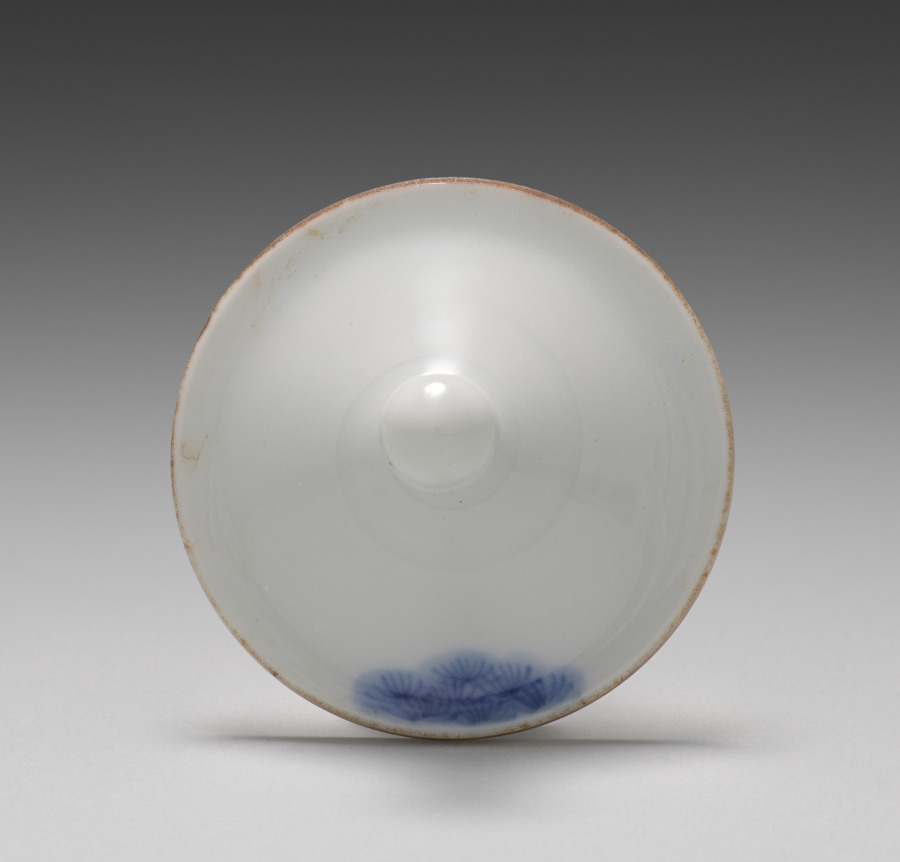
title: Lid for a Teapot with Pines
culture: Japan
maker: Seifū Yohei III (Japanese, 1851–1914)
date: 1893–1914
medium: Porcelain with underglaze blue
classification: Ceramic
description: Side-handled teapots known as kyūsu and hot water coolers, or yuzamashi, are essential components of sencha tea sets. The teapot is, of course, meant for steeping and serving the tea. Yuzamashi are used to cool boiled water to the ideal temperature for the type of tea to be brewed. This teapot has a pine in underglaze blue on each side. The tip of one of these pines reaches onto the tiny lid, and as with the trees on the Water Cooler with Pines, CMA 2022.163, the trunks are curvy ribbons with little definition. Considering the execution of their designs, one might imagine the pot and cooler to have been part of the same set.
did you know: This teapot with images of pines are among Seifū Yohei III’s designs painted in blue.